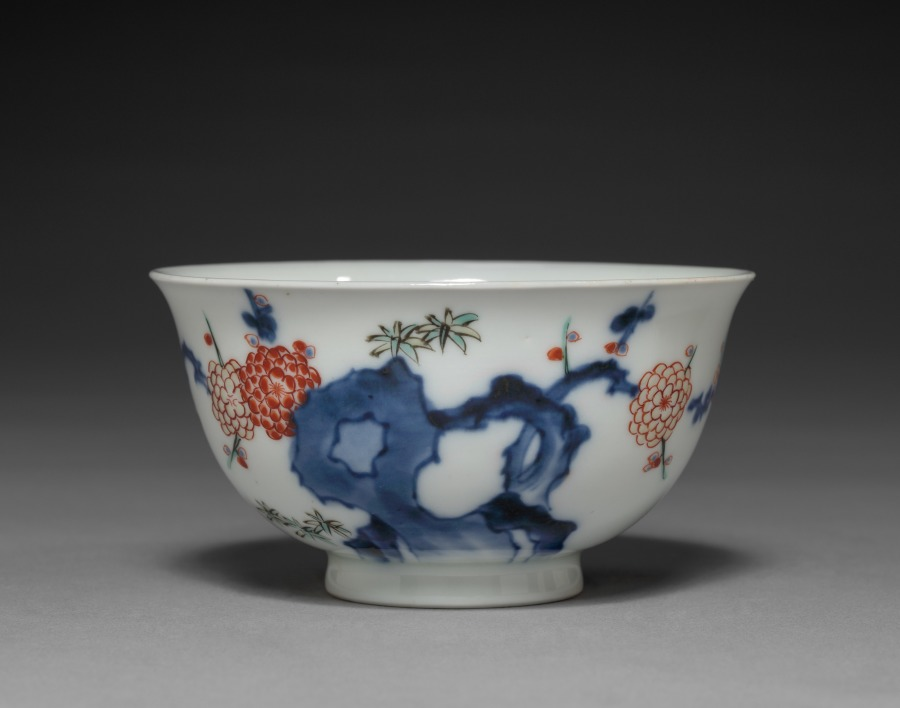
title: Cup with Plum and Rock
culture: Japan, Edo period (1615–1868)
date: 1700s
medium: porcelain with underglaze blue and overglaze enamel decoration (Hizen ware, Ko-Kutani type)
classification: Ceramic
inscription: 福